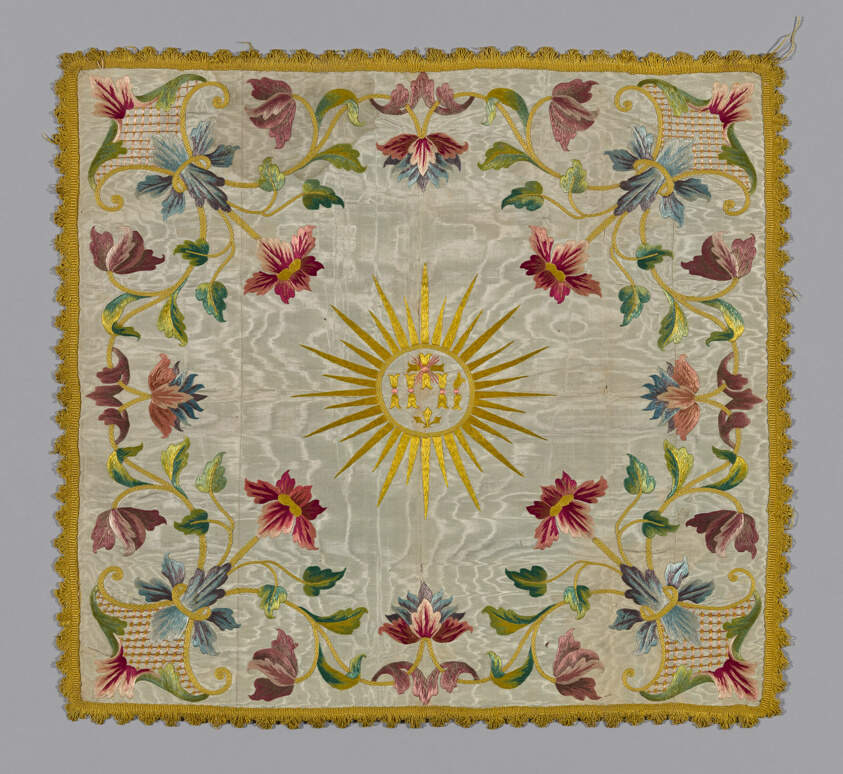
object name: Textile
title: Chalice Cover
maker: Italy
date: 19th century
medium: Silk, warp faced tabby in moiré, with silk, tabby lining and twisted silk fringe. Embroidered in silk floss and twisted silk (2-ply) Stitches: Long and short, couching (in pairs), couched filling. satin, (flat), split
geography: Italy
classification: textile; needlework (visual works)